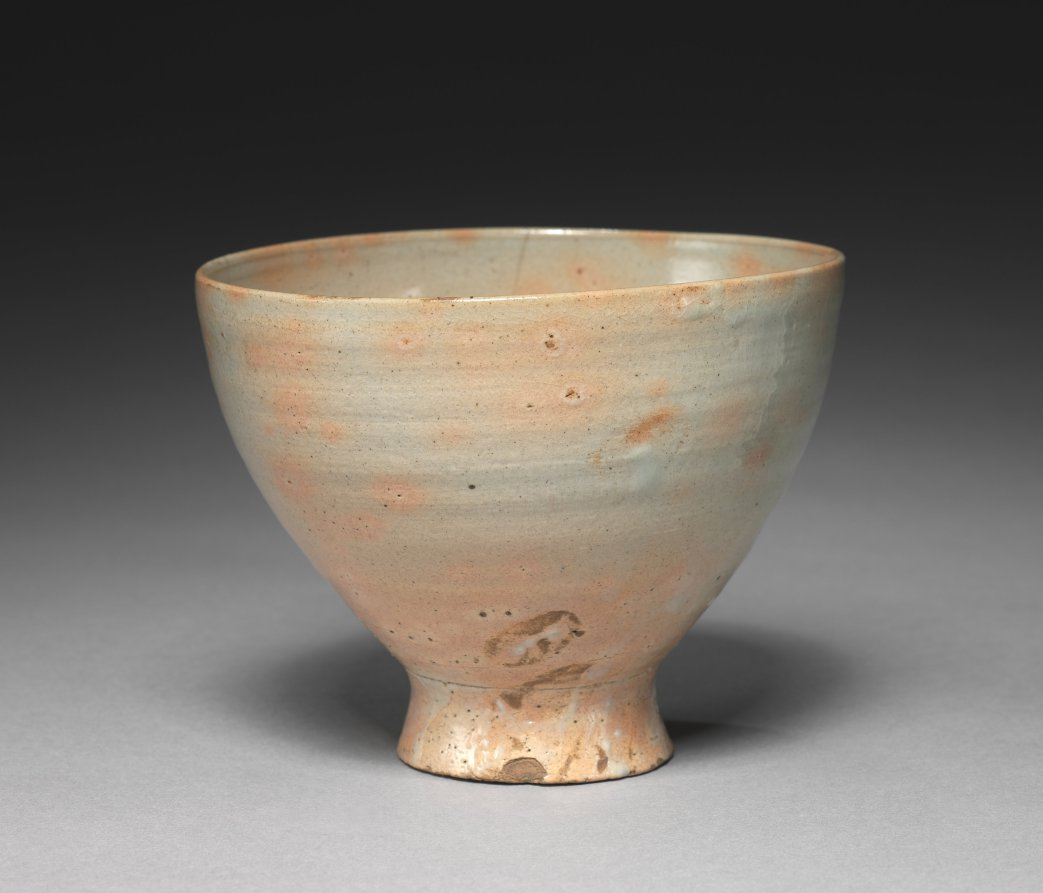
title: Tea bowl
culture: Korea, Joseon dynasty (1392–1910)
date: 1700s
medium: glazed stoneware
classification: Ceramic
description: Possibly produced in one of the kilns established by the trading office (Waegwan) in Busan, southern Gyeongsang province, this type of bowl with an elongated foot was exported to Japan and circulated as an item of foreign luxury among Japanese tea ware collectors. Pinholes in the light pinkish glaze were intended to resemble "fawn spots."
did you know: Pinholes in the light pinkish glaze were intended to resemble "fawn spots."